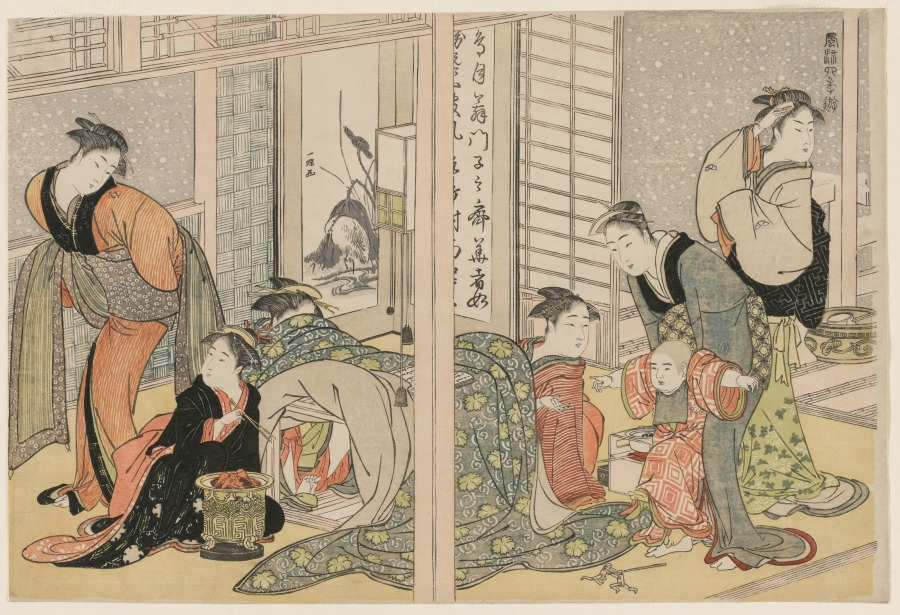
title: Elegant Pleasures of the Four Seasons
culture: Japan, Edo period (1615–1868)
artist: attributed to Kitagawa Utamaro (Japanese, 1753?-1806)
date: c. 1782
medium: Woodblock print; ink and color on paper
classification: Print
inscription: Itchō ga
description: The title of this print suggests a series of four, but only this wintry print is known. A boy has dropped his toy wrestlers as he is hoisted up to a woman who has been enjoying a book at the heated table. Her companion buries her head beneath the blanket to stay warm, her bare feet exposed by a girl tending the hot coals in the pit in the floor.